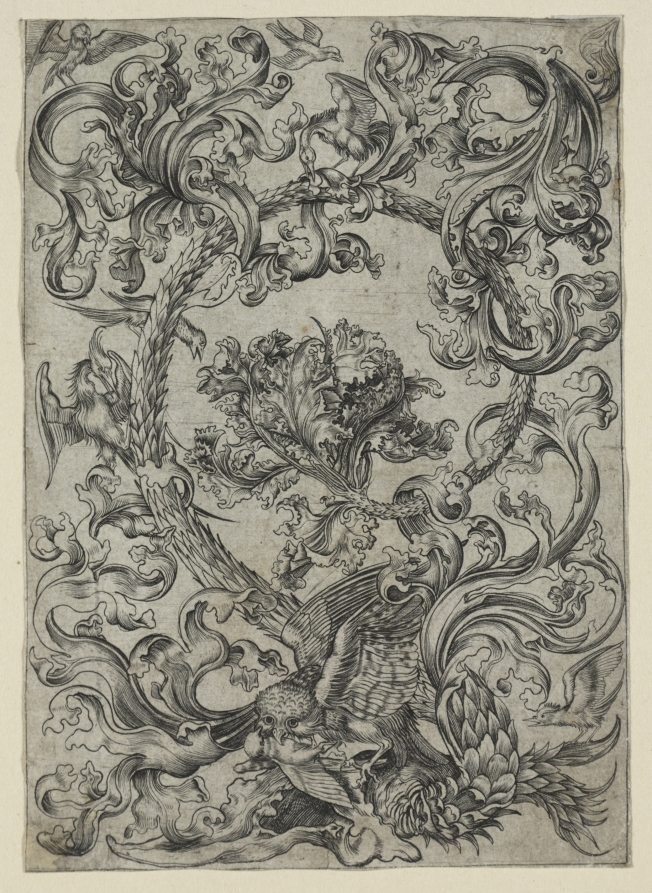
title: Ornamental Foliage, with an Owl and other Birds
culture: Germany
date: 1400s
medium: engraving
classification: Print